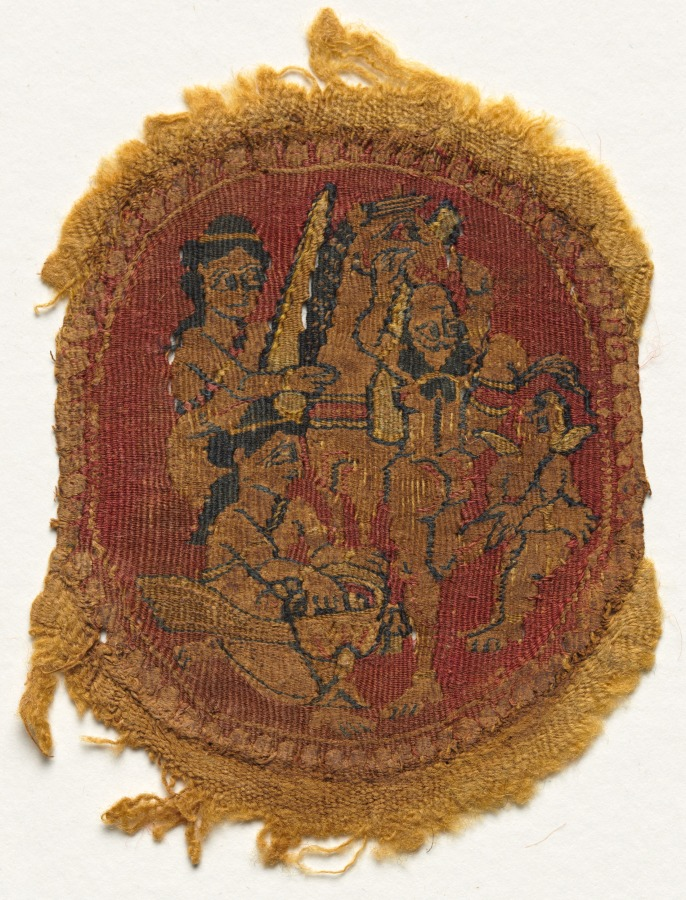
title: Five Round Segmenta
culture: Egypt, Umayyad period (661–750)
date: 650 – 750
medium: tapestry weave: wool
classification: Textile